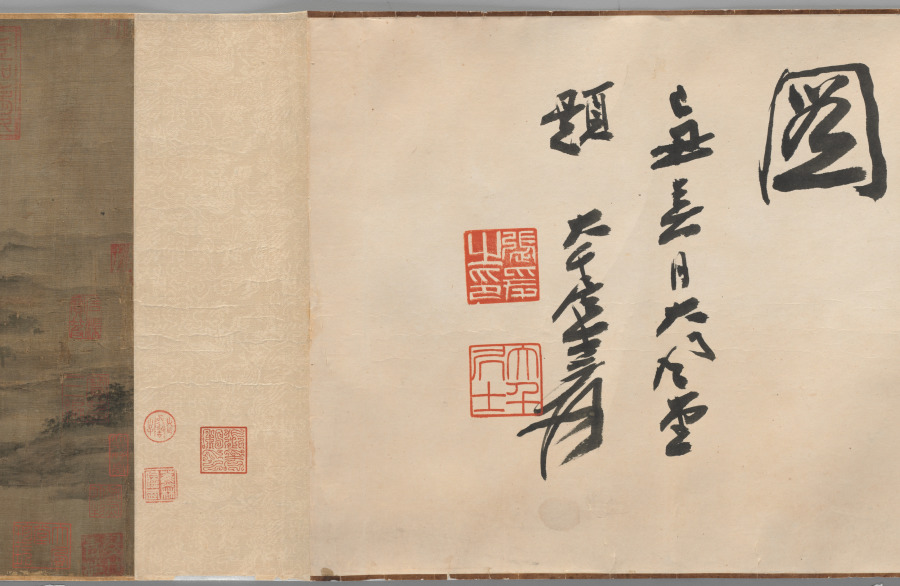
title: Streams and Mountains without End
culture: China, late Northern Song dynasty (960-1127) - Jin dynasty (1115-1234)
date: 1100–1150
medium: handscroll; ink and slight color on silk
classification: Painting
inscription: 9 colophons and 48 seals: 1 colophon, dated 1205, of Wang Wenwei 王文蔚 (dates unknown); 1 colophon, dated 1205, of Li Hui 李惠 (dates unknown); 1 colophon of Weiluo Tian Xie 蔚羅田獬 (dates unknown); 1 colophon, dated 1214, of He Yan 何言 (dates unknown); 1 colophon, dated 1326, of Cao Yuanyong 曹元用 (d. 1329) 1 colophon, dated 1332, of Kangli Zishan 康里子山 (Naonao; 1295-1345); 1 colophon, dated 1336, of Liu Zai 劉載. (dates unknown); 1 colophon, dated 1380, and 4 seals of Yang Mao 楊懋 (1300-after 1380); 4 seals of the Hou family (ca. 1340); 1 colophon of Wang Duo 王鐸 (1592-1652); 4 seals of Zhang Bingqian 張秉乾 (juren of 1729); 8 seals of Liang Qingbiao 梁清標 (1620-1691); 2 seals of the Qianlong emperor (r. 1736-95); 4 seals of the Jiaqing emperor (r. 1796-1820); 3 seals of the Xuantong emperor (r. 1909-11); 2 seals of Ye Gongchuo 葉恭綽 (1881-1968); 17 seals of Zhang Yuan 張爰 (Zhang Daqian 張大千, 1899-1983).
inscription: Colophon 1. Wang Wenwei 王文蔚. Dated third month and third day, 1205, under the reign of Zhangzong of the Jin dynasty. 造物元無心，山川秀氣聚。畫手亦無盡，各出新意度。 誰將妙林泉，淡墨寫縑素。重巒疊嶂間，三兩人家住。 茅舍隔素籬，小橋通細路。溪上數葉舟，雅有物外趣。 嵓崦藏招提，依稀認窗戶。山色四時宜，雲煙自朝暮。 不知塵世中，此景在何處。收拾買山錢，投老好歸去。 泰和乙丑三月三日平原王文蔚謹再拜，書于河東縣署之野趣堂。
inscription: Colophon 2. Li Hui 李惠. The colophon was written three days before the Qingming Festival in 1205. 畫師慣在山中居，含毫吮墨聊自娛。 閑將一段冰霜絹，寫出千里江山圖。 前山後山互出沒，山腰林樾相縈紆。 危橋澗溜瀉鳴玉，山根一匯為平湖。 波平短艇快漁釣，雲深細徑來樵蘇。 僊宮梵宇占幽勝，雕欄複閣森蓬壺。 往來行客煙靄外，飄飄野店青帘孤。 人家雞犬聲相接，熙熙化日安唐宇。 嗟余嗜好何其迂，膏肓泉石真吾徒。 一行作吏墮世網，薄書汨沒勞奔趨。 千巖萬壑但夢想，故園三徑應將蕪。 披圖暫洗黃塵眼，拊膺三嘆空踟躕。 泰和乙丑清明前三日絳臺李惠書于舜城府署之九思堂。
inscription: Colophon 3. Weiluo Tian Xie 蔚羅田獬. 畫工紛紛不可紀，擺脫俗流幾人耳。 夫誰援筆掃鵝溪，一段風煙且千里。 白波青嶂渺無窮，水接山兮山插水。 小橋野店相勾連，古寺樓臺突兀起。 飄然氣象與神俱，但患未明孰姓氏。 郭熙雖老典型存，為問主公無乃是。 此畫世希當寶藏，無與碌碌同一視。 更看卷首數公詩，奇絕清新相表裏。 蔚羅田獬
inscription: Colophon 4. He Yan 何言. Written in 1214. 萬有來自無，一真歸所託。畫師得三昧，胸中幻丘壑。 百態逐墨破，群形隨筆落。地近迹分明，天遙痕隱約。 雲物自吐吞，峯巒非斧鑿。江鄉閴無市，谷關常不鑰。 中有野夫閑，童琴而歩鶴。酒斾出籬懸，漁舟臨岸泊。 澗樹蔽橋樑，巖松迷殿閣。岑疊宿霧重，野曠林煙薄。 危棧接縈紆，亂泉通脈絡。途中人往來，僕馬何羸弱。 怪石虎踡跼，古木龍蟠錯。一幅宜好收，千金非易博。 玉堂閑卷舒，眼界增寥廓。視險尚寛平，見危除慘虐。 氣象溢國華，川澤資廟略。功名業已書，歸去鞭先著。 但知色即空，何是今非昨。飽乎仁智心，箇中無限樂。 貞祐甲戌秋暮，東營何言題。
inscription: Colophon 5. Cao Yuanyong 曹元用 (d. 1329). Dated 1326. 岸擁危橋斷，溪浮小艇斜。 萬山最深處，依約兩三家。 泰定丙寅秋，曹元用題。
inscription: Colophon 6. Kangli Zishan 康里子山 (i.e., Kangli Naonao). The colophon bears a date of 1332. 右溪山圖，意韻蕭灑。一見使人有烟霞之想，真可珍藏。又有□金諸名勝題詩其左。兵火之餘， 殊不易得也。 至順三年暮春之月，康里子山跋。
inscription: Colophon 7. Liu Zai 劉載. 雲拂埜田閑種玉，雨餘巖溜碎傾金。 幾時也結團茆去，麟閤恬然不挂心。 至元二年正月，長安劉載載之謹錄上。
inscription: Colophon 8. Yang Mao 楊懋 (1300–after 1380). 觀此圖，經營位置，筆法高古，山明石潤。其橋梁、路道、樹林、人物、遠近；一一誠得真山水之深趣。非當時名筆有大才者不能至此。不必問其誰何，可為神品。况宋金元三朝名公所跋，尚不能記，想其來尤遠矣。然而物經累變而尚存，是物之有壽者也。余不復再論。文顯其保之。洪武庚申春，八十翁楊懋觀。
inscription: Colophon 9. Wang Duo 王鐸 (1592–1652). 文蓀親翁博雅，文詩鴻暢。舍弟持此喜觀，遂抽管題數語： 山勢委折，筆墨無痕。宋人中如此不多見也。譬之兵家，當是韓白。王鐸。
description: Streams and Mountains without End was a landmark acquisition of 1953, made just a year after Sherman Lee had returned to Cleveland as curator of Oriental art. He acquired it with the intention to provide "a more than adequate foundation for a fine collection of Chinese landscape painting." This impressive work demonstrates the culmination of stylistic developments in Chinese monumental landscape painting following the Northern Song tradition. It represents a journey through a landscape, making it a fitting metaphor for Lee’s journey of discovery and achievement over a lifetime.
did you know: The portrayal of the distant lands is rich with details like pavilions, villages, and human activities.